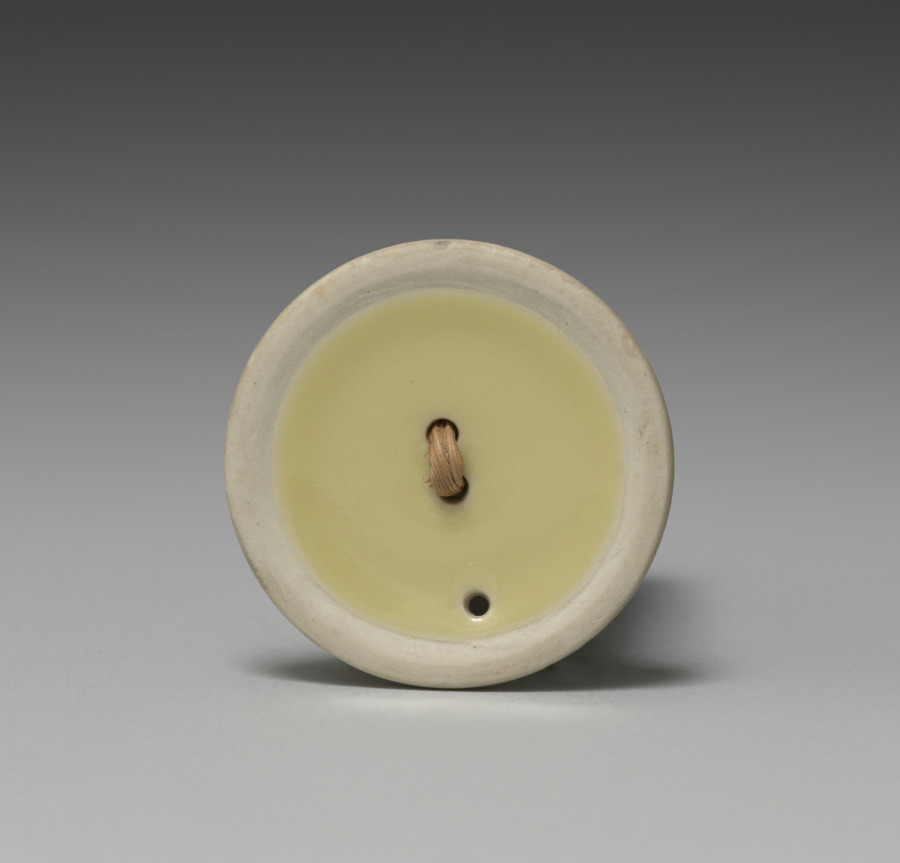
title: Lid for a Sake Pourer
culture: Japan, Taishō period (1912–26) or Shōwa period (1926–89)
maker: Seifū Yohei IV (Japanese, 1872–1951)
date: 1914–46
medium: Porcelain with yellow glaze and bamboo lid handles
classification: Ceramic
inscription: 清風造 。 【印】 清風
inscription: 成山清風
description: Like his father, Yohei IV also produced works with red or yellow monochrome glazes. His yellow-glazed works include this pair of sake pourers, a set of five drinking cups CMA 2022.217, and a sweets bowl molded into the shape of a chrysanthemum CMA 2022.218.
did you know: The lid's handle is made of bamboo.